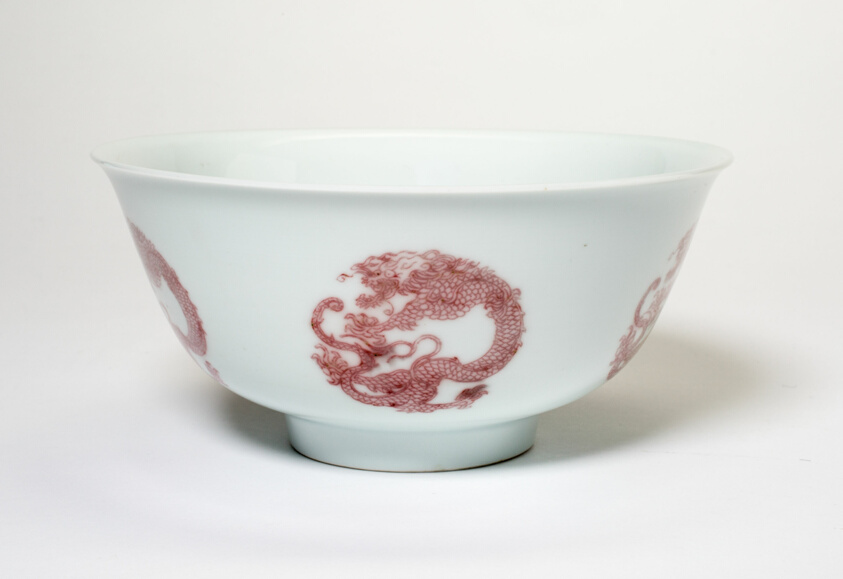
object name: Vessel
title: Bowl with Six Dragon Medallions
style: Chinese (culture or style)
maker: China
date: Qing dynasty (1644–1911), Kangxi reign mark and period (1662–1722)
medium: Porcelain painted in underglaze copper red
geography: China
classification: bowl; porcelain; dish (vessel); asian art; ceramics; vessel